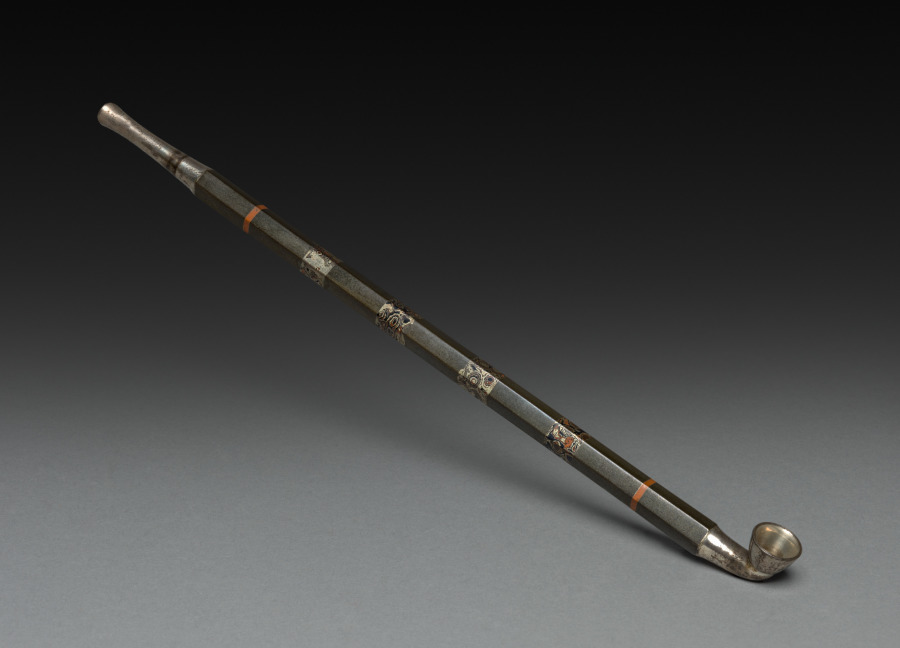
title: Tobacco Pipe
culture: Japan, Edo period (1615–1868)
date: 1700s to mid-1800s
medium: metal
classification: Miscellaneous